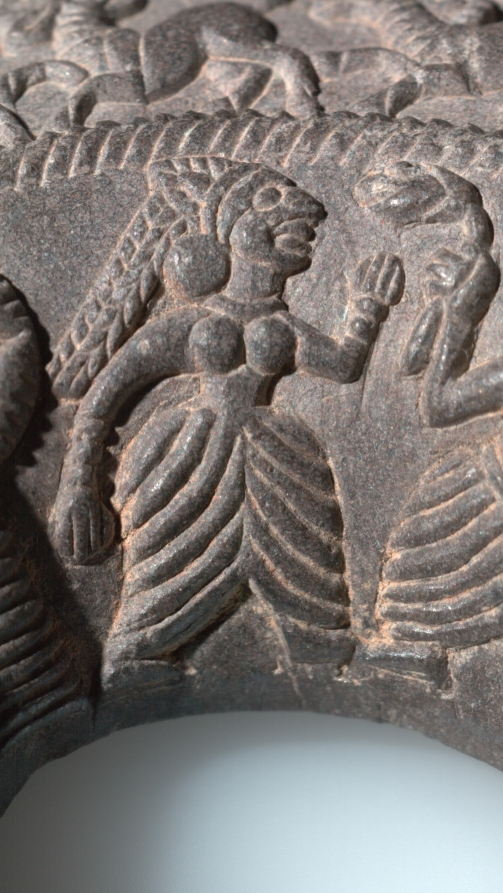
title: Ringstone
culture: India, Maurya period (322–185 BCE)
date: 200s BCE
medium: steatite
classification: Sculpture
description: Ringstones are among the earliest works of art to be created in stone during India's historical period. This example is finely carved with detailed images of affectionate couples and palm trees, running animals, and geometric motifs in concentric circles. The function of ringstones remains uncertain, since none of the surviving examples is inscribed or explained in a text.